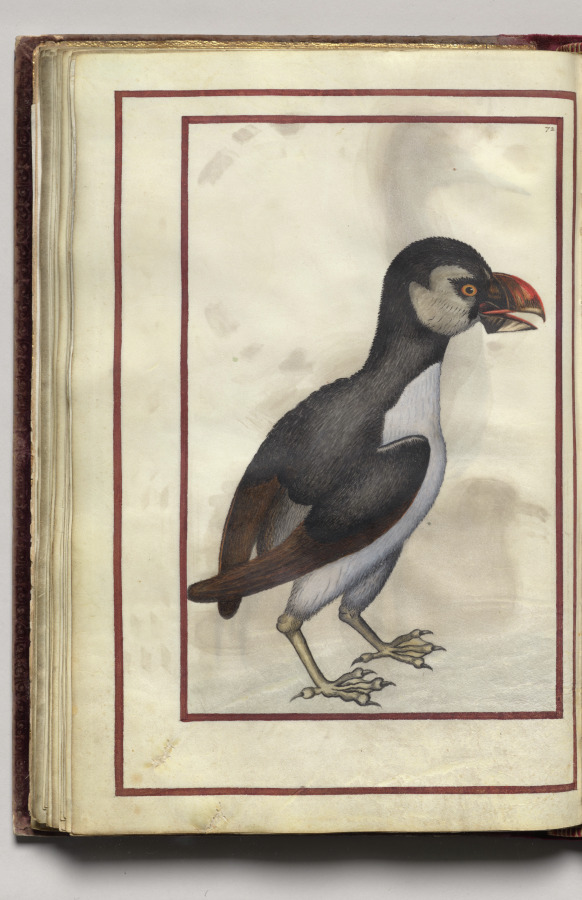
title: Brown and Gray Bird, folio 36 (verso), from Florilegium (A Book of Flower Studies)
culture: France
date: 1608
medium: watercolor, ink, silver, and gold over occasional traces of pencil, on vellum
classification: Bound Volume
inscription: Dated: Poitiers 1608 (on frontispiece) Signed: On frontispiece in black ink, lower right: Van Kuyk Notation on drawing: Frontispiece: in pencil, lower margin: * élève de Van Kessel, peintre flammand (* in pencil also appears in front of Van Kuyk's name).